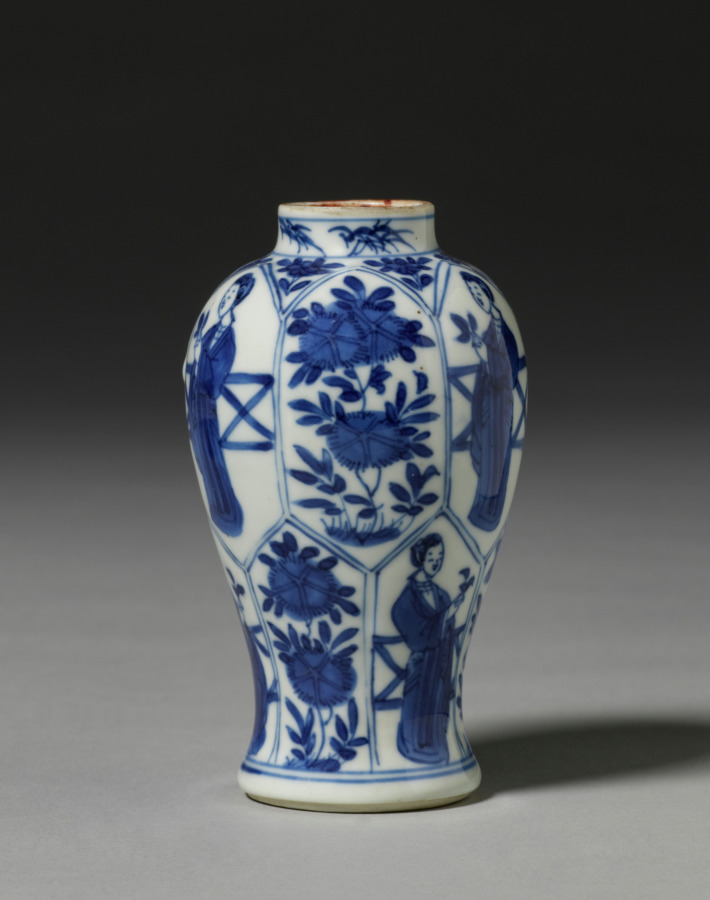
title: Jar with Cover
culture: China, Qing dynasty (1644-1911)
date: 19th Century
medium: porcelain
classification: Ceramic